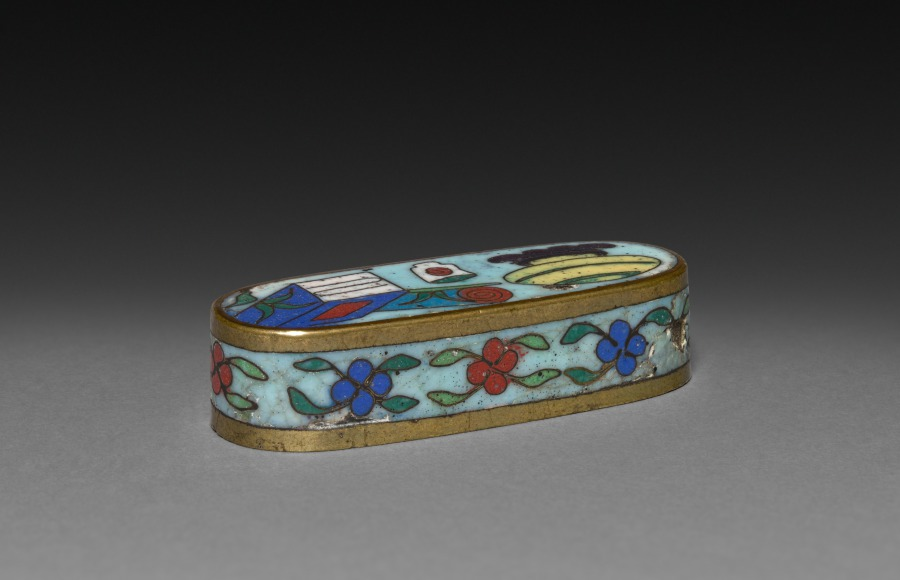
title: Box with Scholar's Accoutrements (lid)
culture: Japan, Meiji period (1868–1912)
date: late 1800s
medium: cloisonne enamel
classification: Enamel